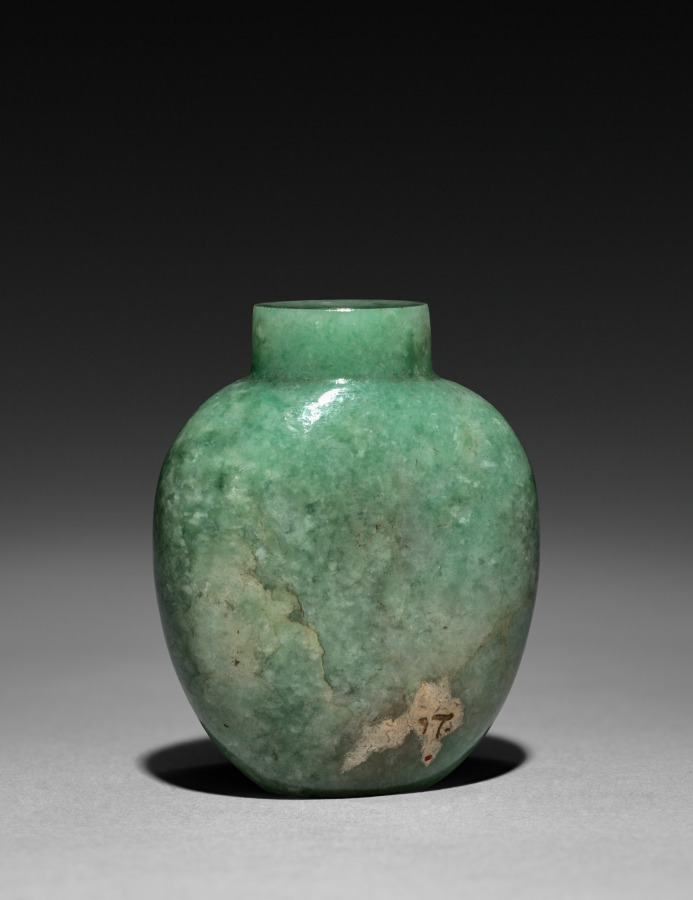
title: Snuff Bottle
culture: China, Qing dynasty (1644-1911)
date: 1644–1911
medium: glass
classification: Glass